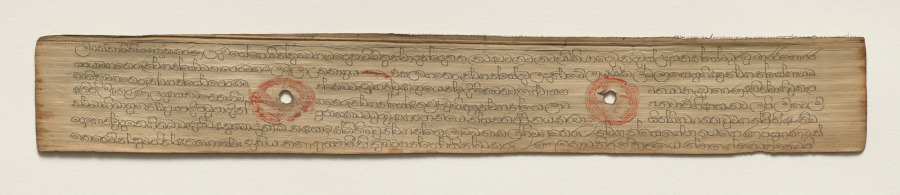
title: Leaf from a Buddhist Manuscript (verso)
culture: Sri Lanka, Singhalese, Late 17th century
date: c. 1700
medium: fiber paper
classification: Manuscript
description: Palm leaf material is still used for manuscripts in Sri Lanka. The palm leaves are prepared first by boiling them, drying them in the sun, and then rubbing them with oils. Scribes then use a metal stylus to incise the text. Then charcoal powder is wiped across the pages, filling in only the inscribed lines.